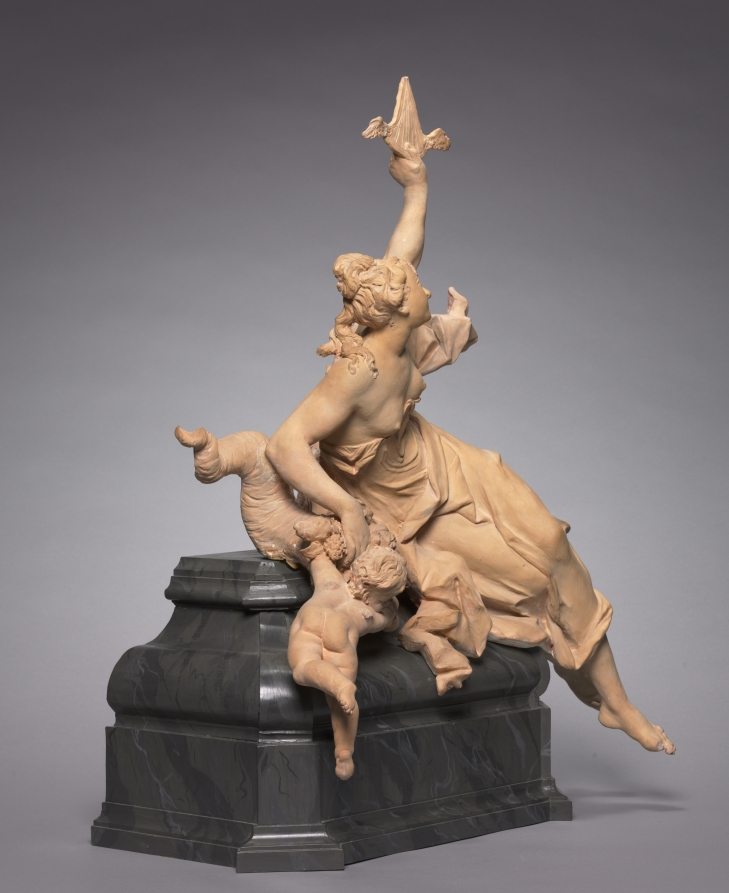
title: Abundance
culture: Austria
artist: attributed to Lorenzo Matielli (Austrian, c. 1688–1748)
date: c. 1730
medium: terracotta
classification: Sculpture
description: This work is probably a model for a garden statue that came from Castle Neuwartenburg near Vocklabruck. Castle Neuwartenburg was built from plans by Domenico Martinelli, with frescoes by Altomonte and sculpted decorations of the doorway and gardens by Lorenzo Matiellli (who also designed the door figures of the Cloisters at Melk and St. Michael's church in Vienna). The completion and dedication of the castle took place in 1732 with a personal visit by Emperor Karl VI. The statue was never executed, and the model remained in the castle.